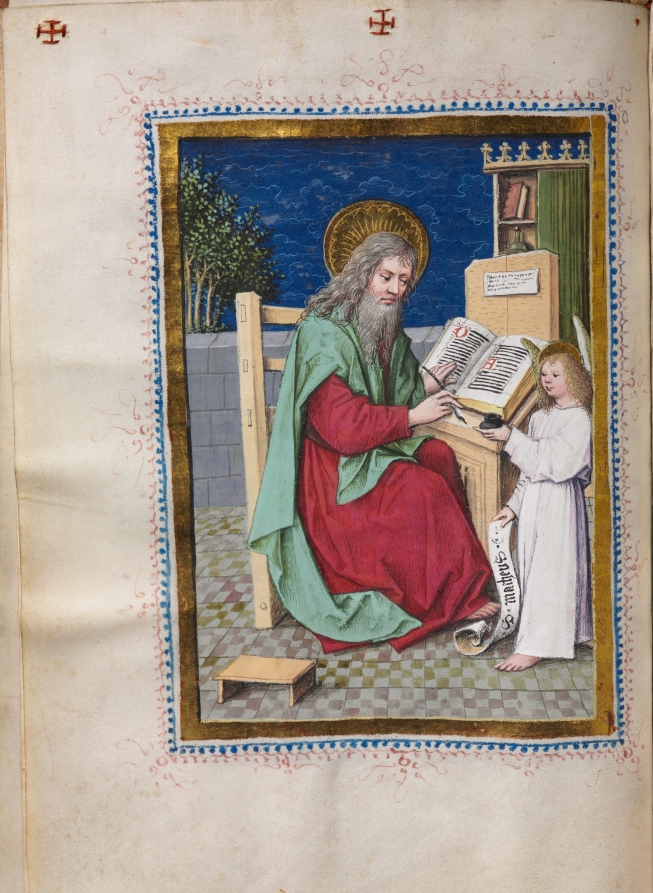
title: Gospel Book with Evangelist Portraits: Saint Matthew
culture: Germany, Middle Rhine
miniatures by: Master of the House-Book (German, c. 1470–1500)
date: c. 1480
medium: ink, tempera, and gold on vellum; original blind stamped leather binding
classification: Bound Volume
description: Each of the four gospels, here in Latin, are preceded by a full-page miniature of the appropriate Evangelist. As is conventional, the Evangelists are represented as contemporary scribes seated at a lectern surrounded by all the accouterments of the trade---inkpots, quill pens, penknives, etc. The miniatures' style is characteristically German late Gothic in its expressive use of angular drapery and realistic detail. Each miniature, however, bears the marks of The Hausbuch Master's hand: notice the terrace space for each figure and the emphasis on realistically rendered details, such as the furniture construction and the tools of the scribe as well as the facial types, with their heavy-lidded, downcast eyes. This artist was occasionally noted for his humor, as here in the portrait of the Evangelist John in which he depicted the saint erasing an error in his text with a pen knife in his left hand and a quill pen in his right. The skillful penwork, tracery, vine scrolls, and the large initials are the work of the other artists. The binding is original. The Hausbuch Master is known primarily for an album of lively drawings as well as some ninety copper engravings. He was also a panel painter of some distinction.